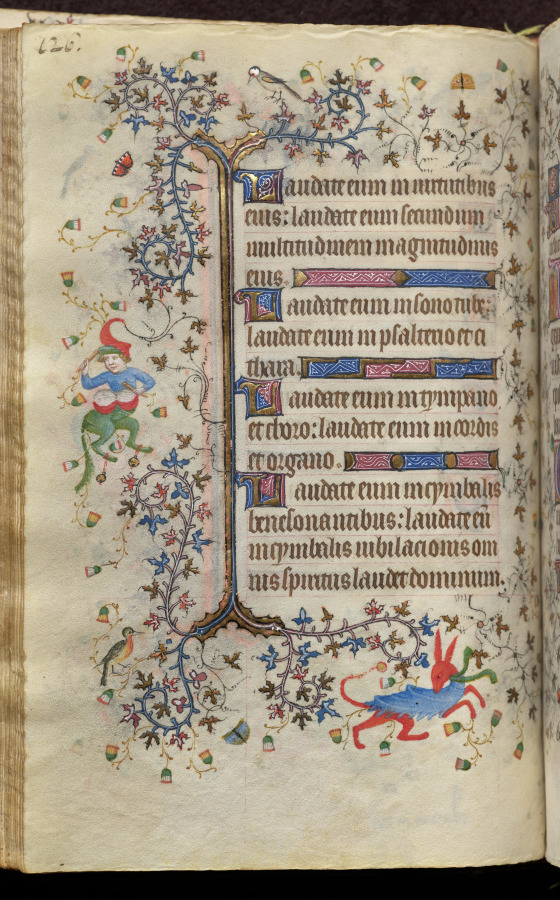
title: Hours of Charles the Noble, King of Navarre (1361-1425): fol. 63v, Text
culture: France, Paris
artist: Master of the Brussels Initials and Associates (French)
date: c. 1405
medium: ink, tempera, and gold on vellum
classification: Bound Volume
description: This precious volume was obviously highly prized by its owner, the French-born King of Navarre, who had his coat of arms painted on no less than twenty folios. Rather than directly commissioning this manuscript from a specific workshop, it seems that Charles the Noble acquired his book of hours -- perhaps ready-made for the luxury market -- while on a trip to Paris in 1404-05. A collaborative effort, six painting styles are evidenced within the pages of this codex, those of two Italians, two Frenchmen, and two Netherlanders. The painter who was responsible for the planning and decoration of the book, and who produced seventeen of the large miniatures, was a Bolognese artist known as the Master of the Brussels Initials. His principal assistant, responsible for most of the borders, was a Florentine who signed his name "Zecho" da Firenze on folio 208 verso.